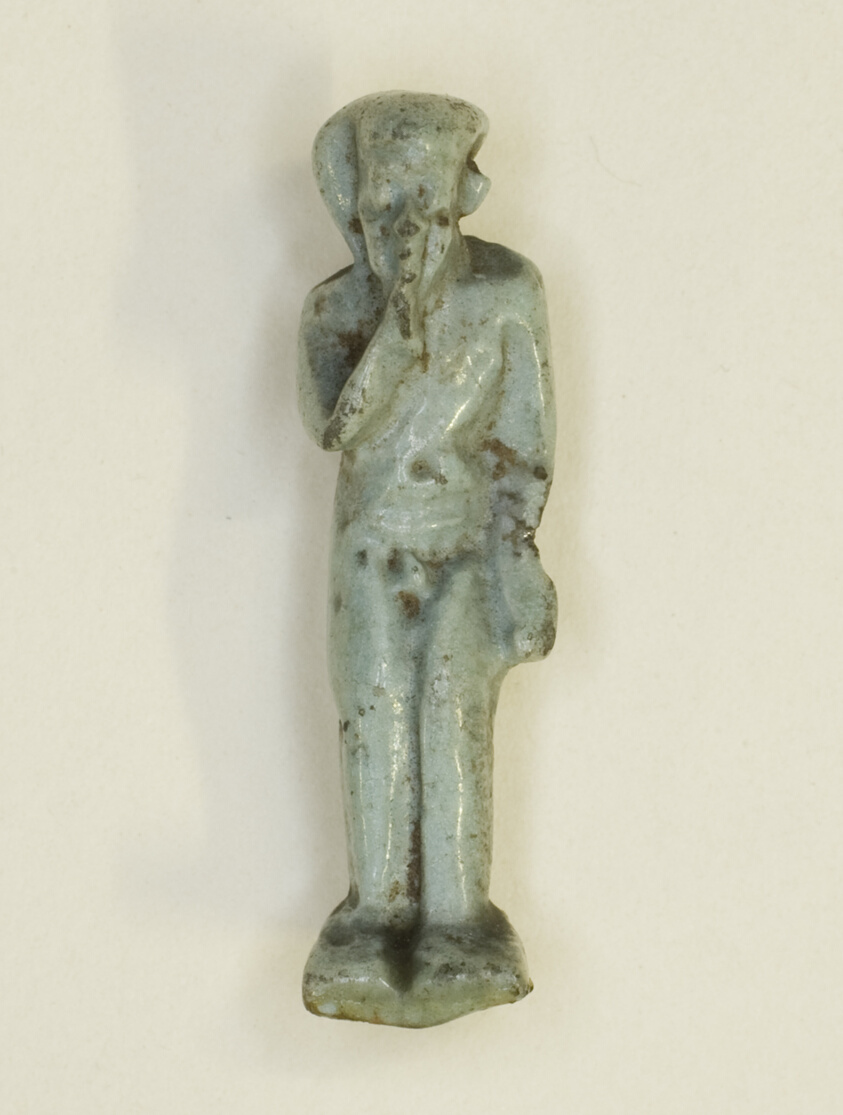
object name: Costume and Accessories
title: Amulet of the God Horus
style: third intermediate period, egyptian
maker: Egyptian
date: Third Intermediate Period, Dynasty 21–25 (1070–656 BCE)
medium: Faience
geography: Egypt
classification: amulet; jewelry; ceramics; ancient art; costume; faïence (composite material)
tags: gods (deities)